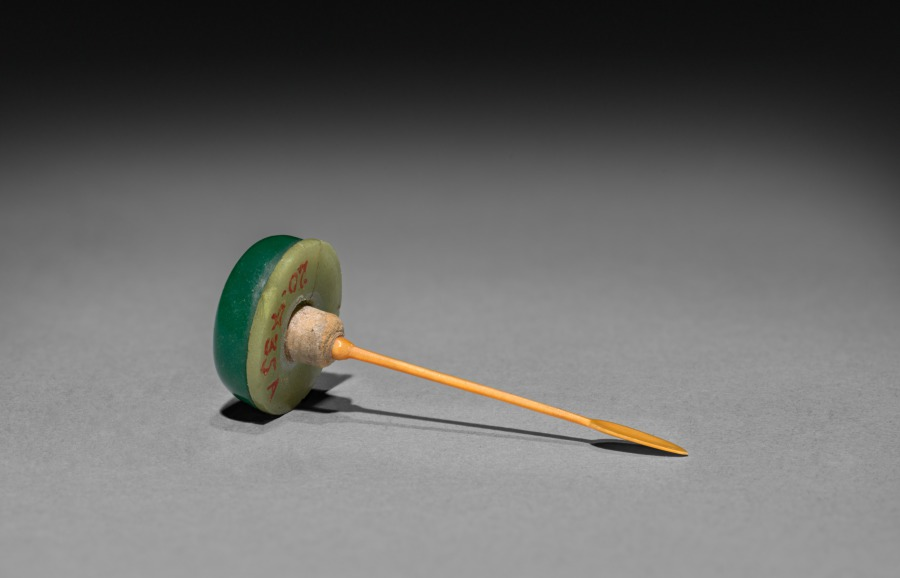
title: Snuff Bottle (stopper)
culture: China, Qing dynasty (1644-1911)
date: 1644–1911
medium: glass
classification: Glass